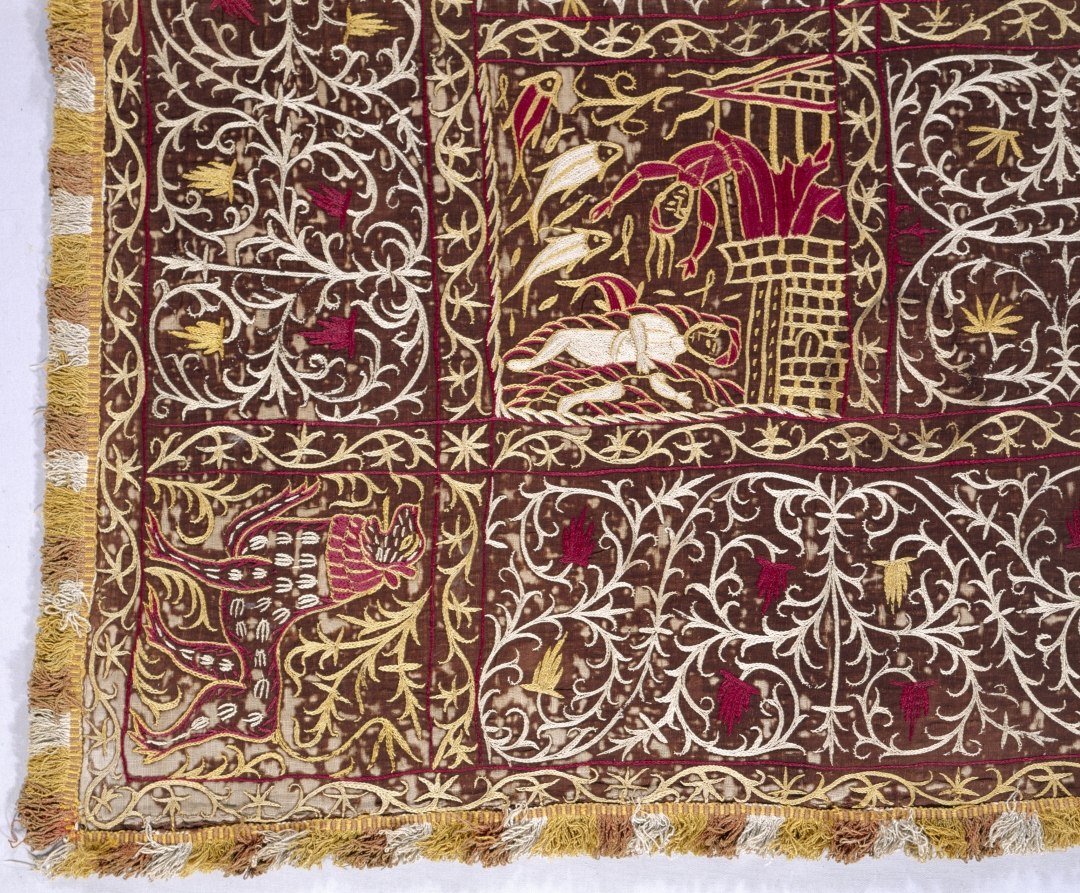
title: Bedspread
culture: India, Goa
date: 1600s–1700s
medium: Silk on cotton; embroidery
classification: Embroidery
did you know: The design features biblical scenes with Indian mythological characters and Portuguese-costumed figures embroidered in chain stitch.